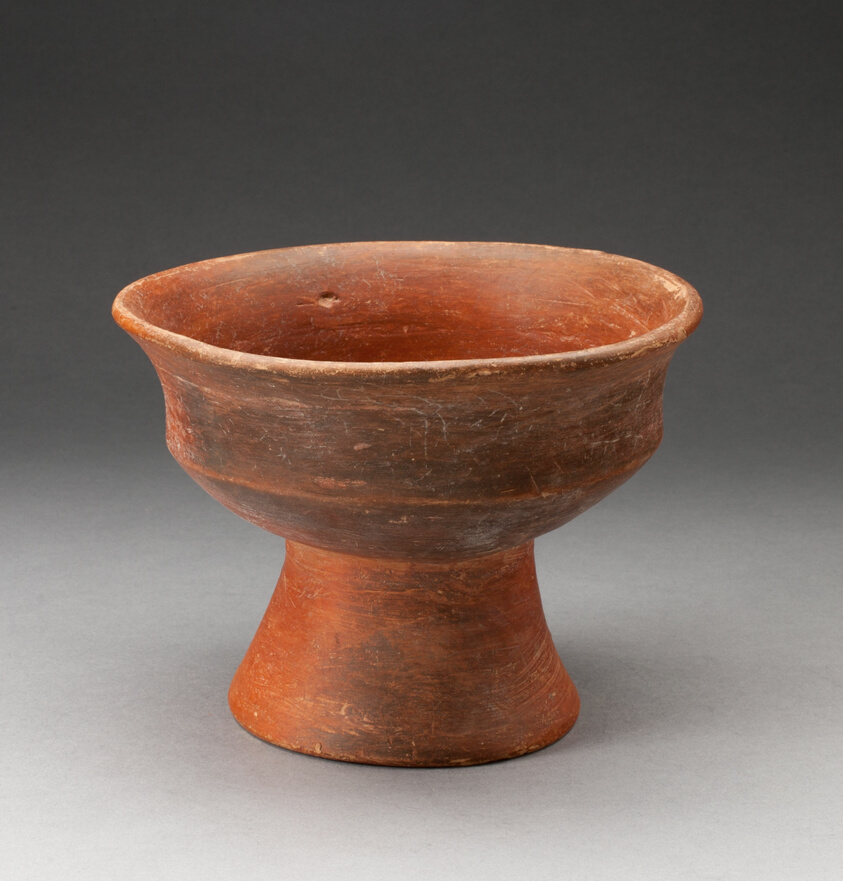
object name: Vessel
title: Footed Vessel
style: maya, mayan, americas, Arts of the Americas, mesoamerican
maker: Maya (Mexico or Guatemala)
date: 200–700 CE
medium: Ceramic and pigment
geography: Mexico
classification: earthenware; art of the americas; ceramics; vessel